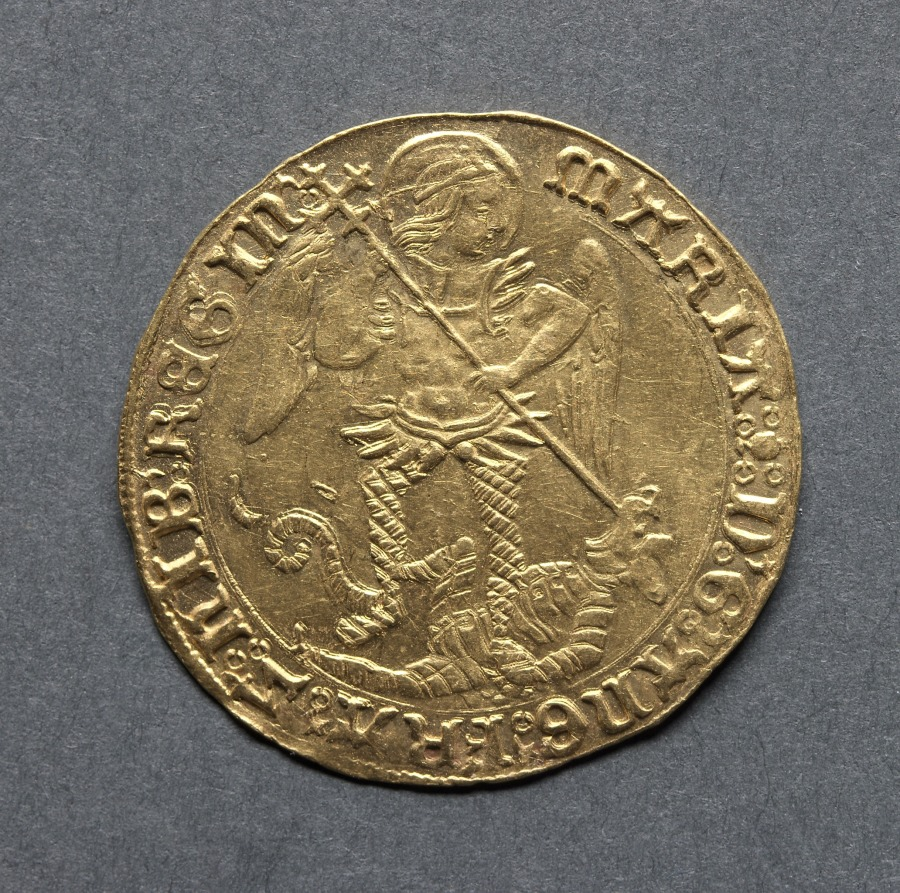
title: Angel: An Angel Slaying a Dragon (obverse); Ship with Shield of Arms (reverse)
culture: England, Mary, 1553-1554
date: 1553–54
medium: gold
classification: Coins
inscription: MARIA D G ANG FRA Z HIB REGIN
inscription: A DNO FACTV EST ISTVD Z EST MIRABI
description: This piece is one of the finest specimens known. It contains on the reverse, at the end of the legend, an unexplained mark that strongly resembles a small letter c, superimposed on a figure 7.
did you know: The angel was an English gold coin introduced by Edward IV in 1465.